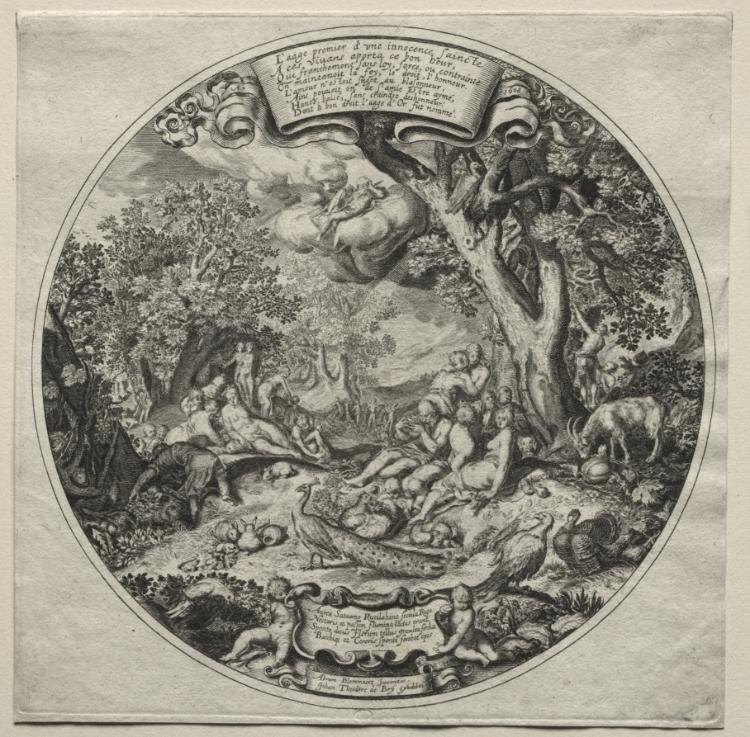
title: The Golden Age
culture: Flanders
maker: Johann Theodor de Bry (German, 1561–1623)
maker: after Abraham Bloemaert (Dutch, 1566–1651)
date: 1608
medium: engraving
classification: Print